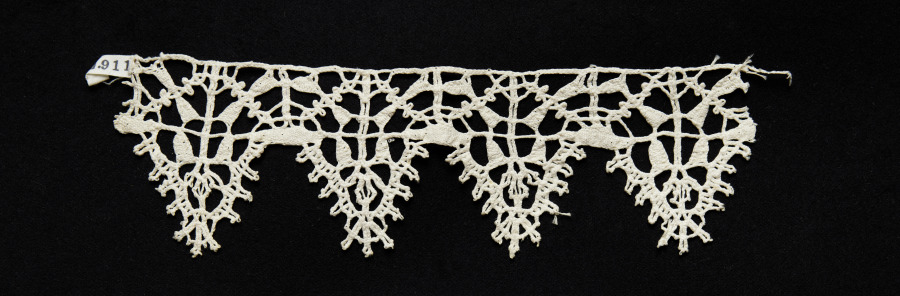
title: Lace Edging of Points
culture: Italy, Genoa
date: 1550–99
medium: Bobbin lace (needle lace, cutwork [punto tagliato] design)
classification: Lace